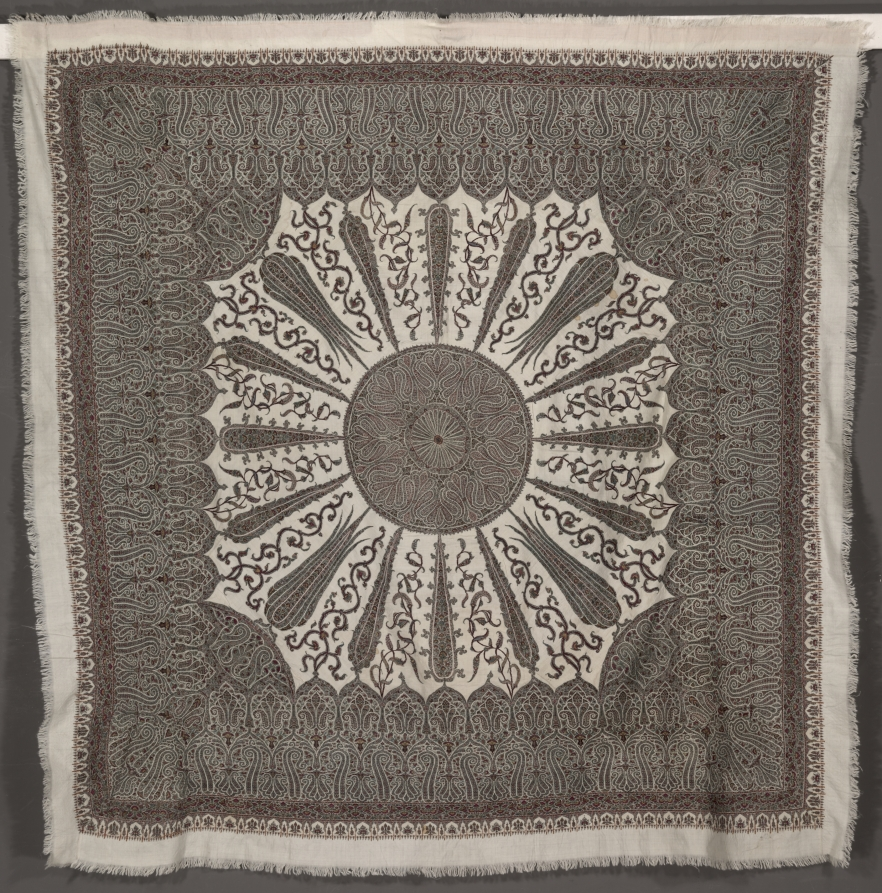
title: Square Shawl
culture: India, Kashmir, late 19th century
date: 1880s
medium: twill tapestry and embroidery; large pieced areas: wool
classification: Textile